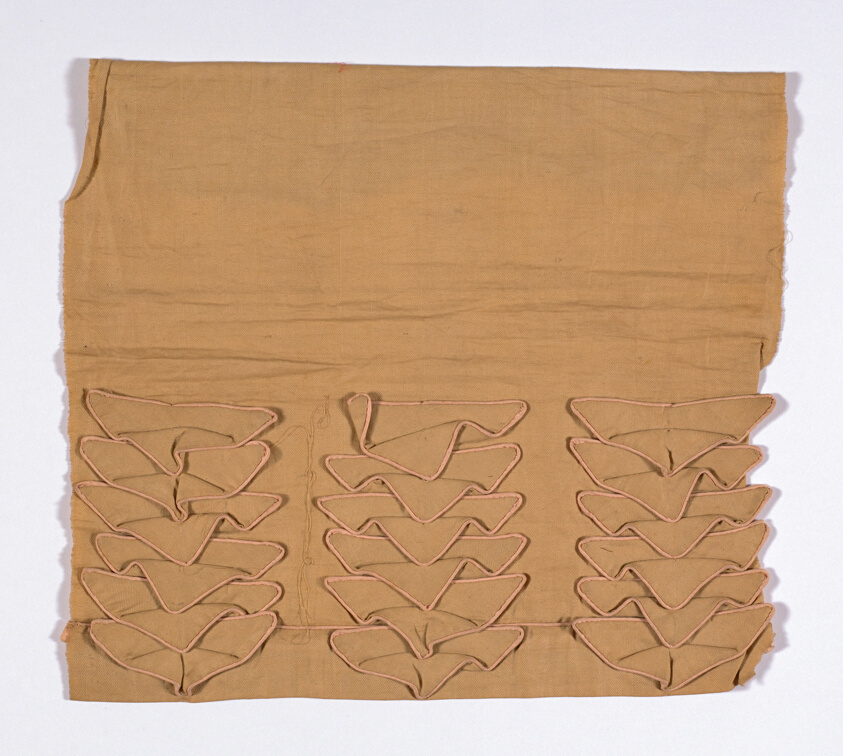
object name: Textile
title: Sample (Dress Trimming)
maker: England or France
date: 1815/1835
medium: Cotton, twill weave; edged with cotton, plain weave; appliquéd with cotton, twill weaves; edged with cotton, plain weaves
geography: France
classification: textile; needlework - costume; weaving